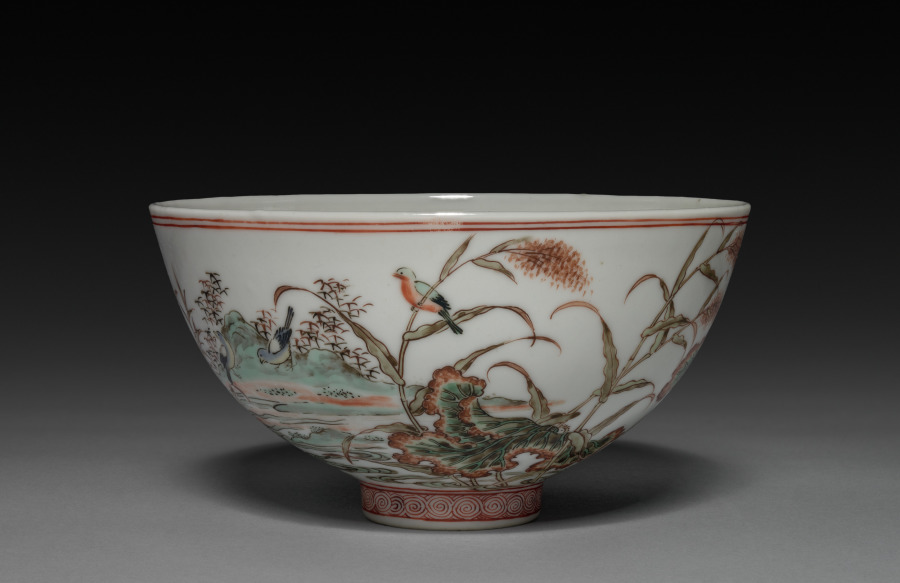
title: Bowl with Waterfowl on a Lotus Pond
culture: China, Jiangxi province, Jingdezhen kilns, Qing dynasty (1644-1911), Kangxi reign (1662-1722)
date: 1662–1722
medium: porcelain with famille verte overglaze enamel decoration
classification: Ceramic